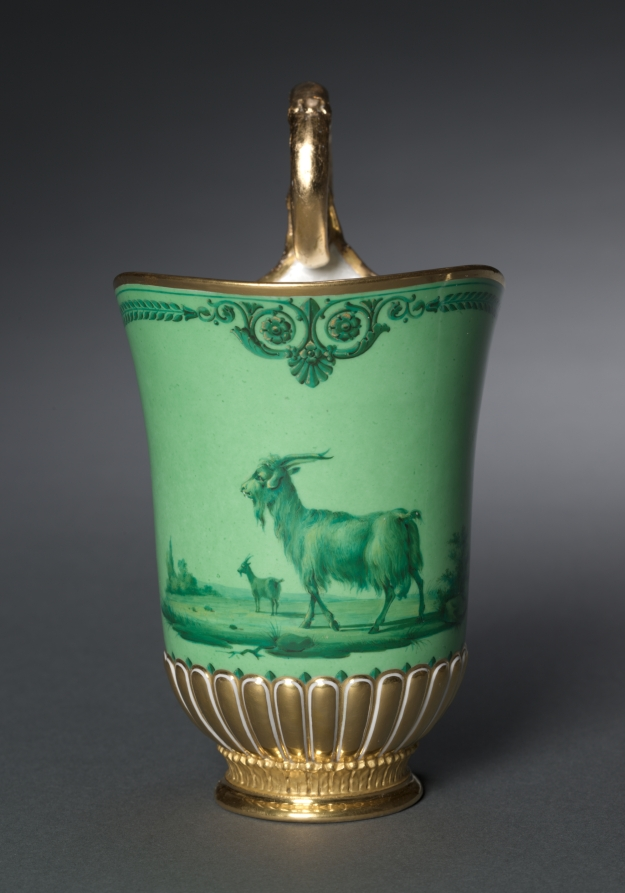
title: Cream Jug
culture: France, 18th-19th century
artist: Sèvres Porcelain Factory (French, est. 1756)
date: designed 1788, made 1831–1834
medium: gilt porcelain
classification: Ceramic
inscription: R...R(?)-34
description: The pattern for this cream jug was originally designed for Marie-Antoinette, queen of France, in 1788